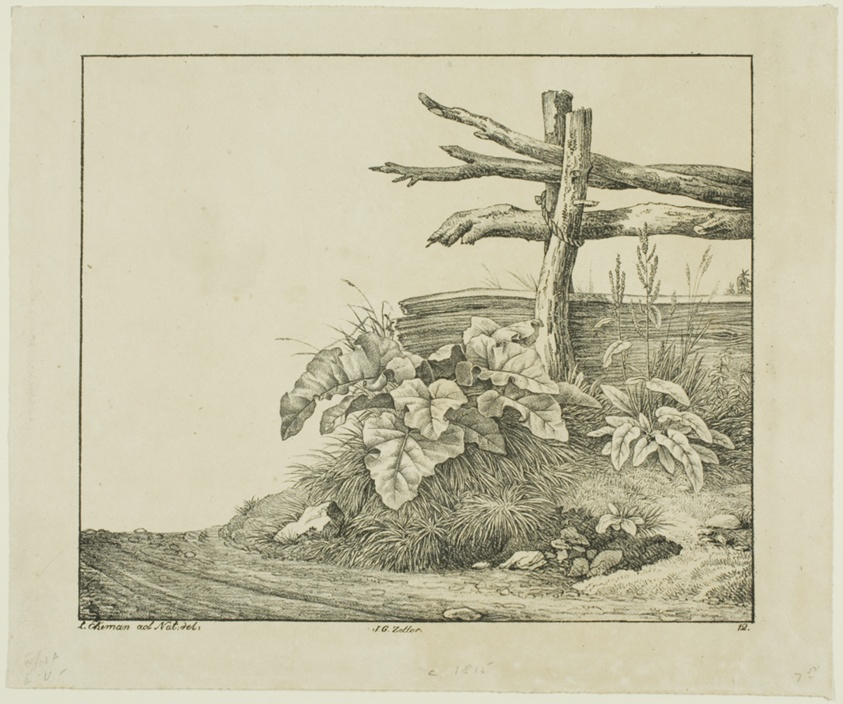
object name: Print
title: Landscape with Flora and Rustic Fence near Roadside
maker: Lorenz Ekemann Alesson (Swedish, 1791-1828)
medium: Lithograph on paper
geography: Sweden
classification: lithograph; print; prints and drawing